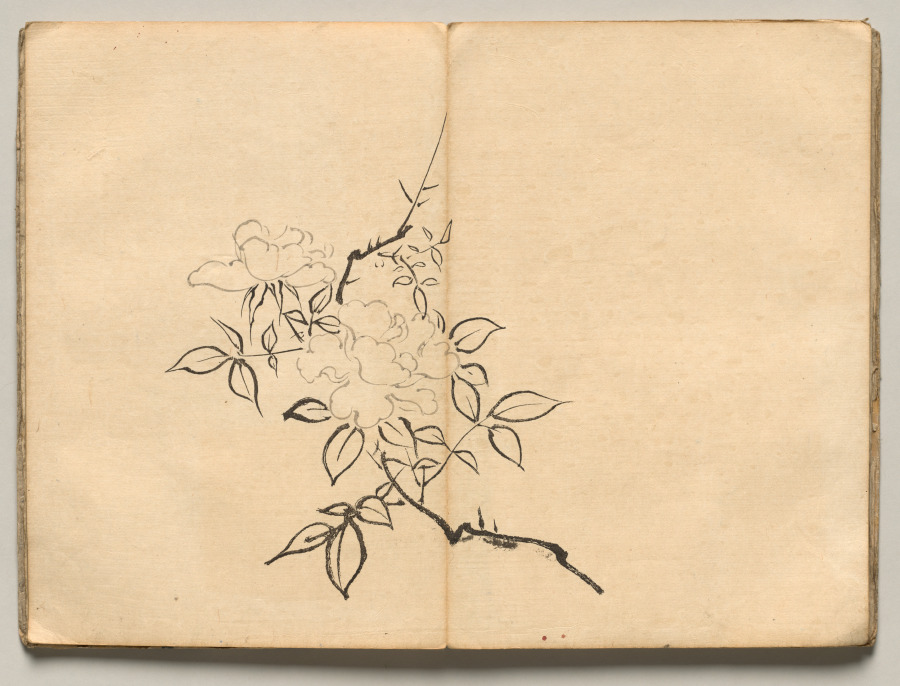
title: Peony from Ōkyo Picture Book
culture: Japan, Edo period (1615–1868)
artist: after Maruyama Ōkyo (Japanese, 1733–1795)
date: 1850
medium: accordion-style woodblock printed folding-book; ink and color on paper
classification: Bound Volume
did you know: This impression of a book of woodblock-printed designs is missing a spread that depicts a crane.